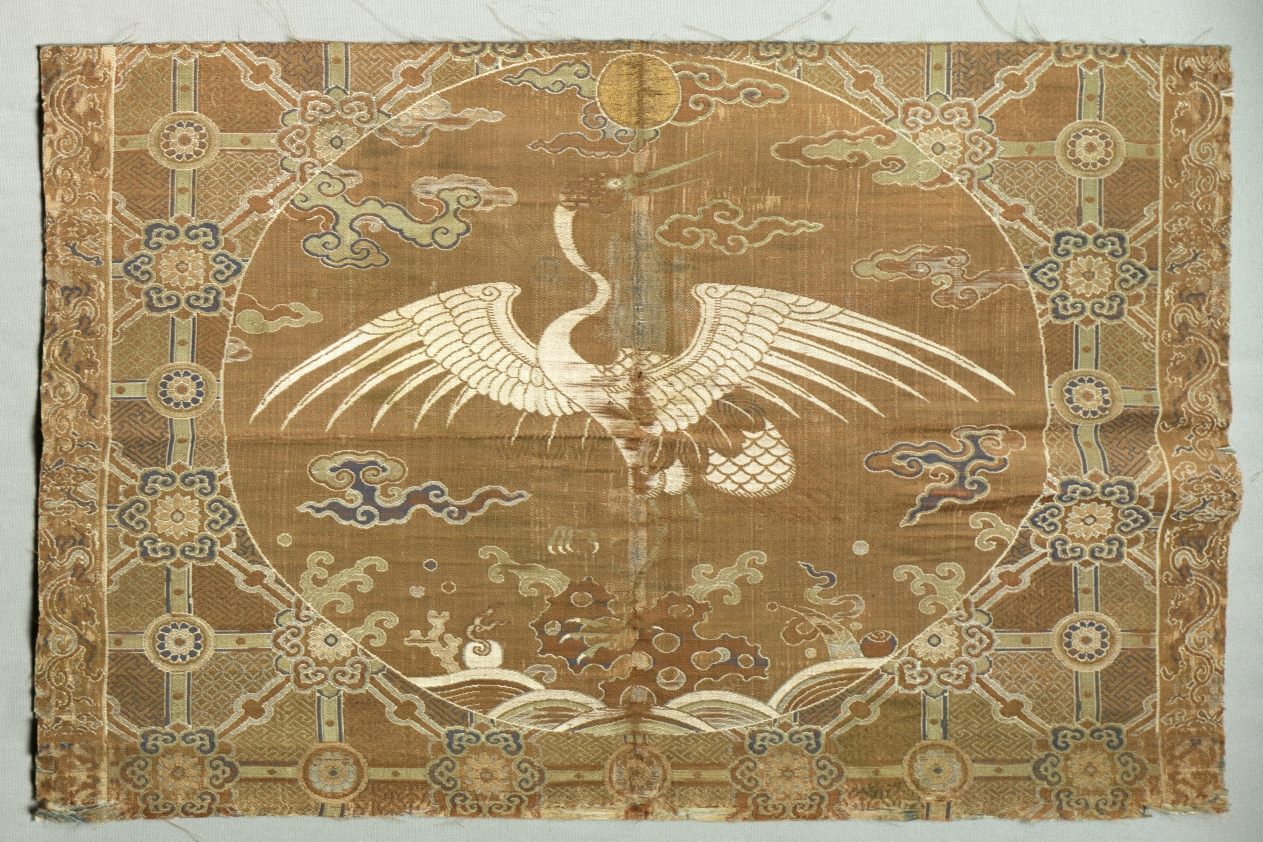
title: Fragment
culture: China, 18th century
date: 1700s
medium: twill ground; silk diasper weave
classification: Textile